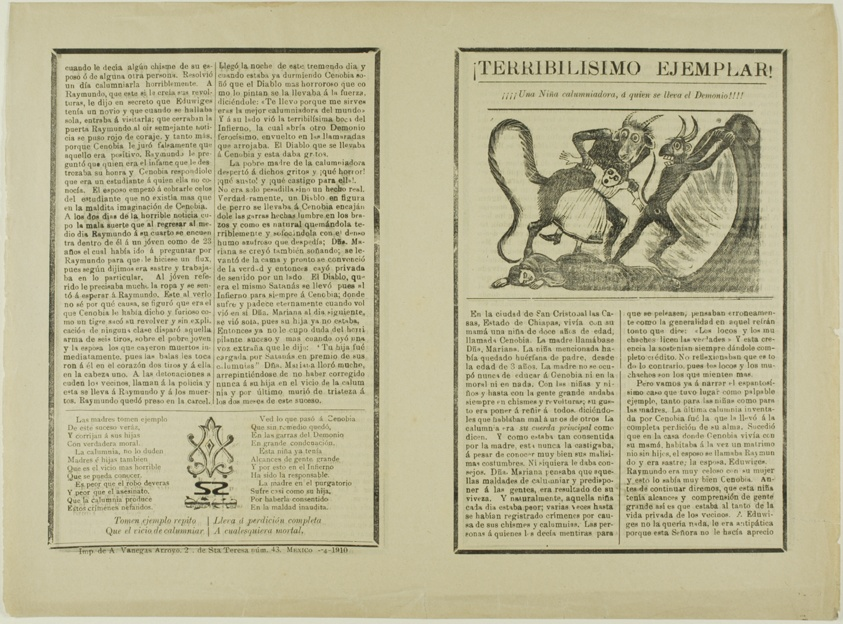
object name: Print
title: Very Terrible Example!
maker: José Guadalupe Posada (Mexican, 1852-1913)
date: 1910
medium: Relief engraving or stereotyped plate on tan wove paper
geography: Mexico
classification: relief etching; print; prints and drawing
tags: text